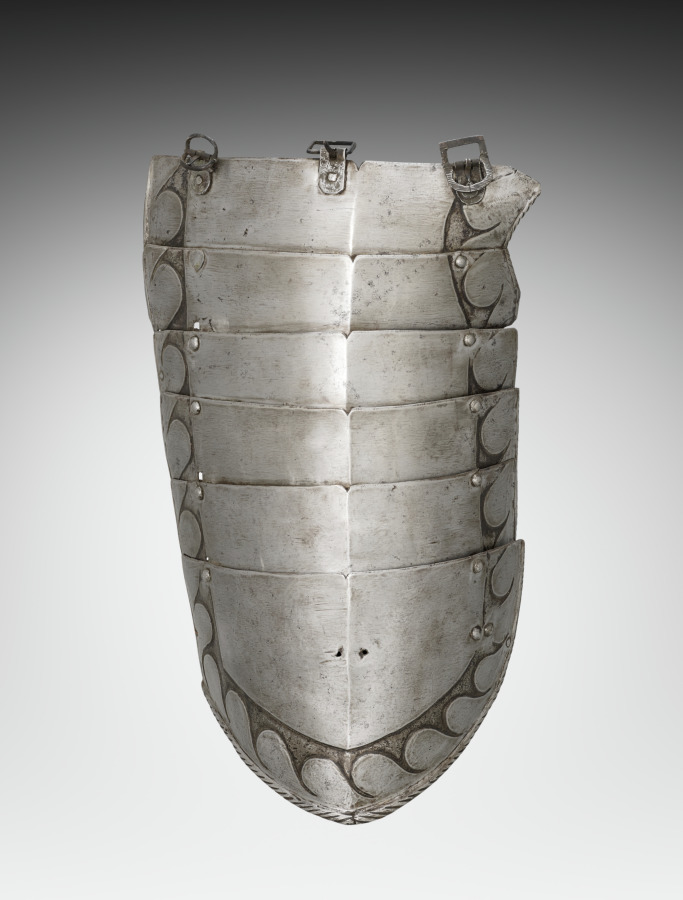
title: Tasset (1 of 2)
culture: Germany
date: c. 1540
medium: steel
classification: Arms and Armor